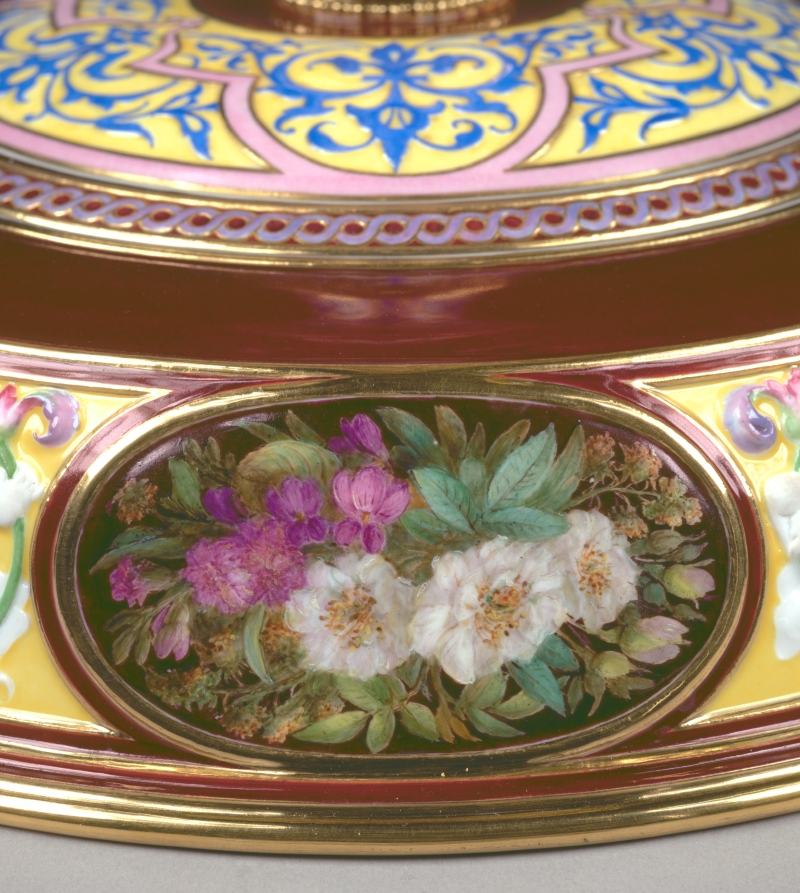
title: Standing Cup and Cover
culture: France, Sèvres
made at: Sèvres Porcelain Factory (French, est. 1756)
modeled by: Hyacinthe-Jean Regnier (French, 1803–1870)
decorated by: Francois-Hubert Barbin (French, 1786-)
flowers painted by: Jacques-Nicolas Sinsson (French)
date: 1844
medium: porcelain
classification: Ceramic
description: The official French porcelain factory at Sèvres has always been one of Europe's most important ceramic manufacturers, famous for its decorative pieces as well as more utilitarian wares. This vase in the Renaissance style, its design inspired by 16th-century French examples, is clearly in the tradition of elaborately conceived and decorated pieces intended for use by the French court or as presentation pieces by its monarchs. The latter was the fate of this Covered Cup, acquired in 1846 by Queen Marie-Amélie d'Orleans, the wife of Louis-Philippe, king during the July Monarchy (1830-48). Soon thereafter the vase was presented to a now unknown person. It is one of four pieces of this design made at the Sèvres factory, and the only one known today to have survived.